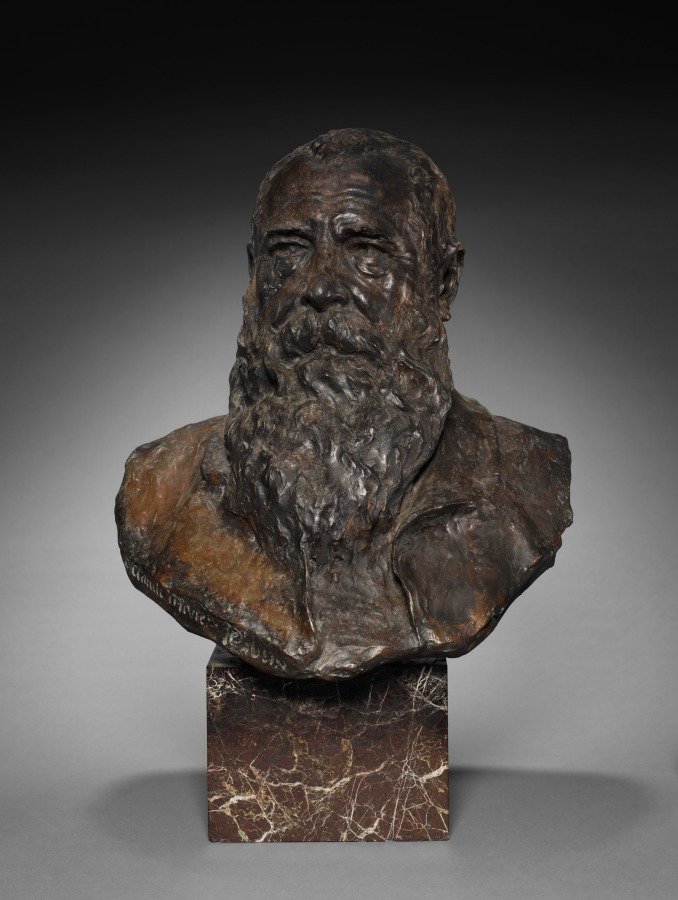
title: Claude Monet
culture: France, 20th century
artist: Paul Paulin (French, 1852–1937)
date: late 1800s-early 1900s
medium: bronze, marble base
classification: Sculpture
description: Paul Paulin was a renowned Parisian dentist who had a passion for sculpting and was encouraged by Edgar Degas to pursue an artistic career. Paulin is best known for his portrait busts of notable Impressionists. There are related versions of this portrait bust of the celebrated painter Claude Monet at three museums in Paris: the Petit Palais (plaster), the Musée d'Orsay (bronze), and the Musée Rodin (bronze).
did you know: In addition to Claude Monet, Paul Paulin also made portrait busts of Edgar Degas, August Renoir, Camille Pissarro, and Auguste Rodin.